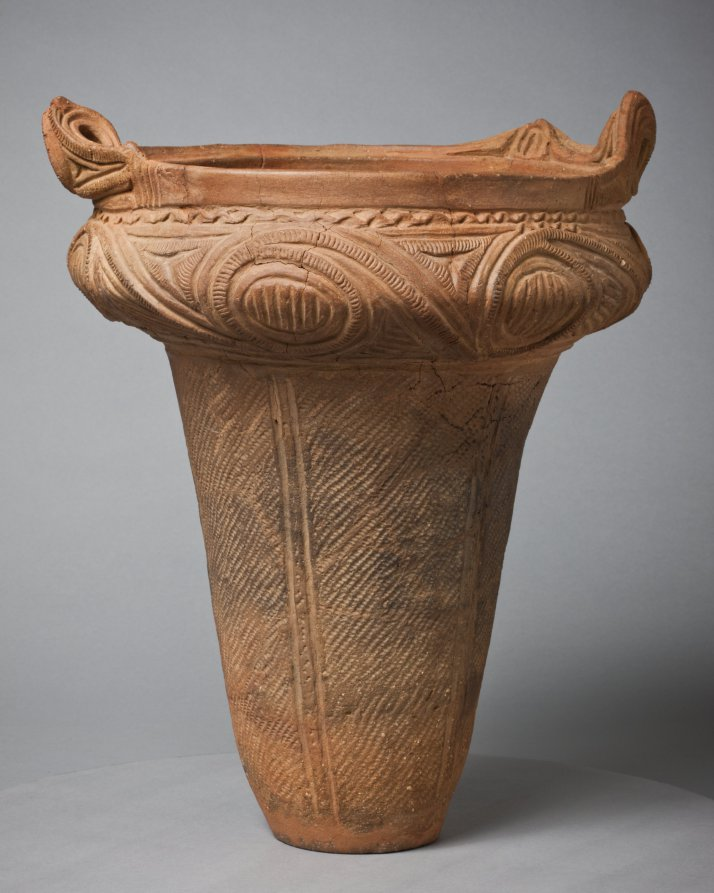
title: Urn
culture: Japan, Jōmon period (c. 10,500–300 BCE)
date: c. 2000 BCE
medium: earthenware, terracotta, impressed and incised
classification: Ceramic